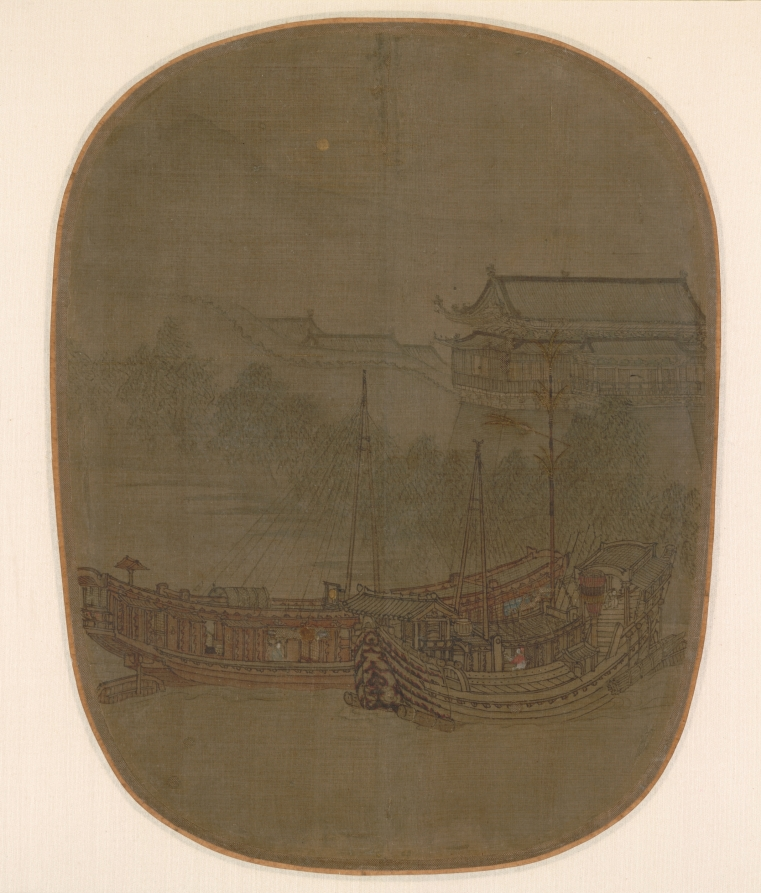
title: Boats at Anchor on West Lake at the City Gate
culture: China, Southern Song dynasty (1127-1279)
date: 1150–1200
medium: Album leaf; ink and color on silk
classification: Painting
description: Highlighted with a few bright accents, this fan painting conveys a nightly atmosphere with boats anchoring on West Lake at the foot of the city walls. Willow trees line the embankment, and the moon appears above the mountains. While the city is asleep, a figure wearing red inside a boat holds what appears to be a pipa (plucked stringed instrument), while a blue-robed gentleman nearby gazes toward the sound of music, evoking an association with Song of the Lute (Pipa xing) by Tang poet Bai Juyi (772–846) which tells the story of a romantic encounter on the Yangzi River.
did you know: The depiction of the female figure playing the pipa and the scholarly male evokes an association with a romantic encounter narrated in a well-known Tang dynasty poem.